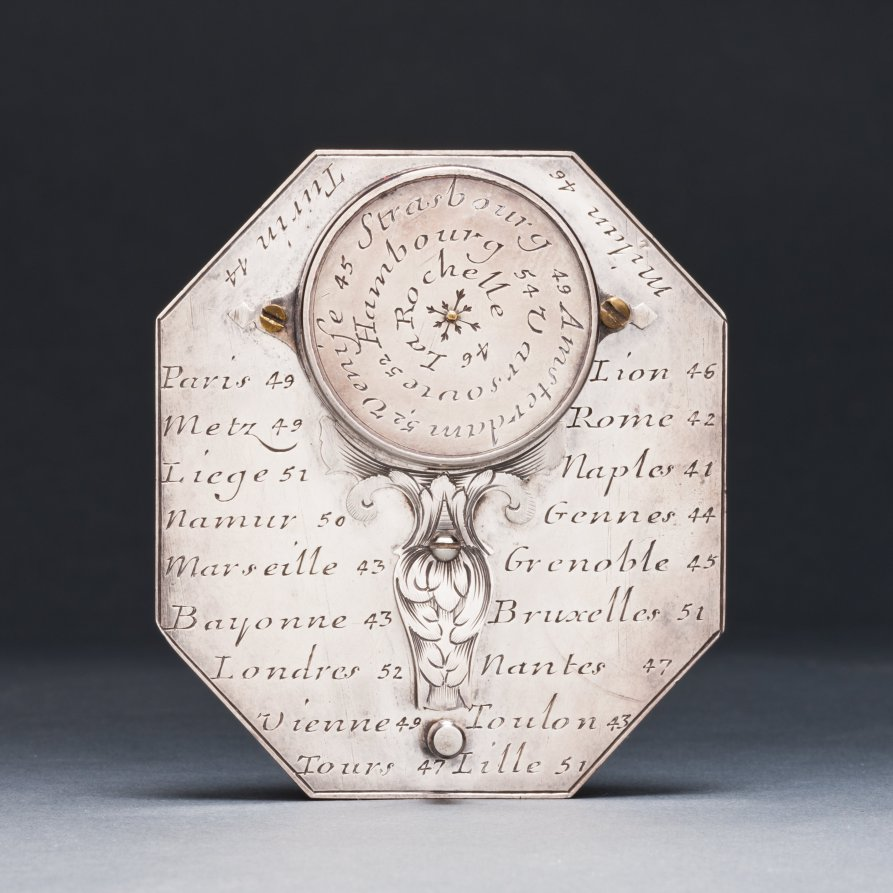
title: Butterfield Sundial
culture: France, 18th century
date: 1700s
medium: silver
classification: Silver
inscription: [Engraved signature above the compass in ribbon band]: "N. BION A Paris"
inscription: [Engraved on the face of the sundial]: “Pour 55° 4-5-6-7-8-9-10-11 50° IIII-V-VI-VII-VIII-IX-X-XI 45° 5-6-7-8-9-10-11 40° -VI-VII-VIII-IX-X-XI'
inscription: [Engraved on the other side]: "Pour 55° -8-7-6-5-4-3-2-1-0 50°-VIII-VII-VI-V-IIII-III-II-I 45°-8-7-6-5-4-3-2-1 40°-VII-VI-V-IIII-III-II-I"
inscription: [Engraved around the compass]: “NORD-OUEST-SUD-EST”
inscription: [Engraved on the back of the sundial]: “Turin 44 Milan 46 Paris 49 Lion 46 Metz 49 Rome 42 Liege 51 Naples 44 Namur 50 Gennes 44 Marseille 43 Grenoble 45 Bayonne 43 Bruxelle 51 Londres 52 Nantes 47 Vienne 48 Toulon 43 Tours 47 Lille 51”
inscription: [Engraved around the back of the compass]: “Venise 45 Strasbourg 49 Amsterdam 52 Hambourg 54 Varsovie 52 La Rochelle 46”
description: Butterfield-type sundials are characterized by their adjustable gnomons, metal flaps that cast a shadow on the dial’s face to indicate the hour, and geographical indices. This sundial has a scale adjustable between latitudes of 40° to 60° north. The latitudes of 26 European towns are engraved on its back for quick reference. With an intricately engraved silver face, it would have functioned as a fashionable traveler’s accessory.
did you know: Butterfield-style sundials were named after Micheal Butterfield, an English scientific and mathematical instrument maker who worked in Paris between 1674 and 1724.